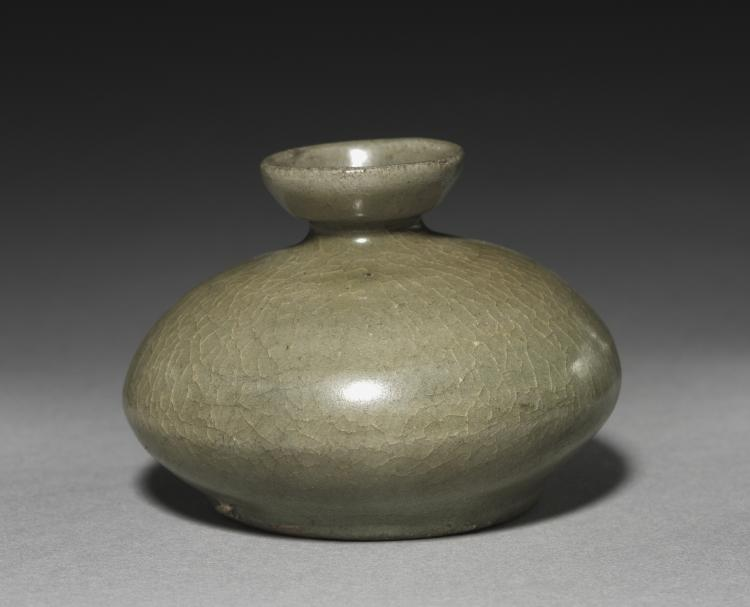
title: Oil Bottle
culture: Korea, Goryeo dynasty (918–1392)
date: 1100s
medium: pottery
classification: Ceramic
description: Celadons, spoons, seals, and bronze mirrors were the most common burial objects in tombs during the Goryeo period (918-1392). Once used to contain oil treatment for hair, this little celadon bottle was one of the standard goods that furnished elites' tombs.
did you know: This bottle was used to contain oil treatment for hair.